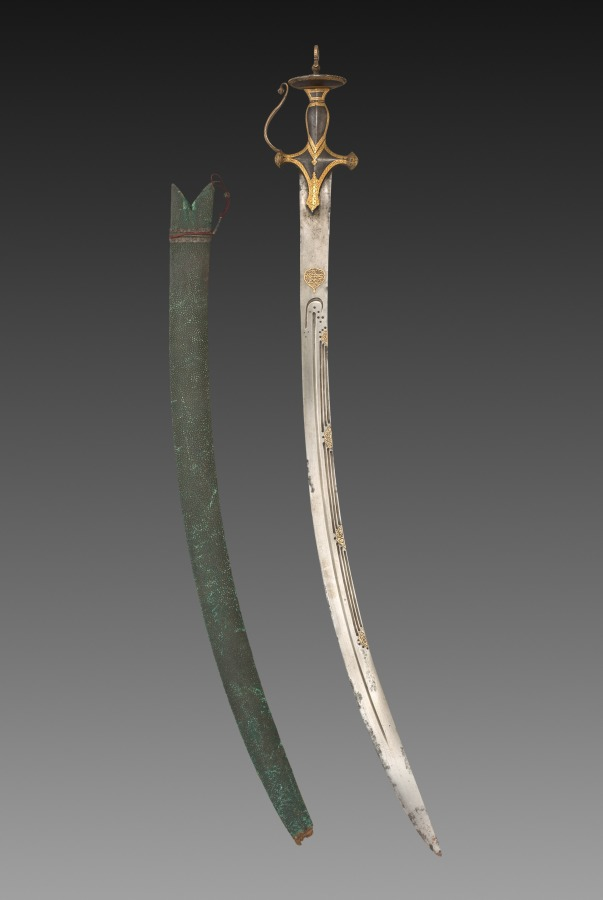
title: Silapa Sword with Green Leather Case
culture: India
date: 1700s–1800s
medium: gold with inlay and leather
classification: Arms and Armor